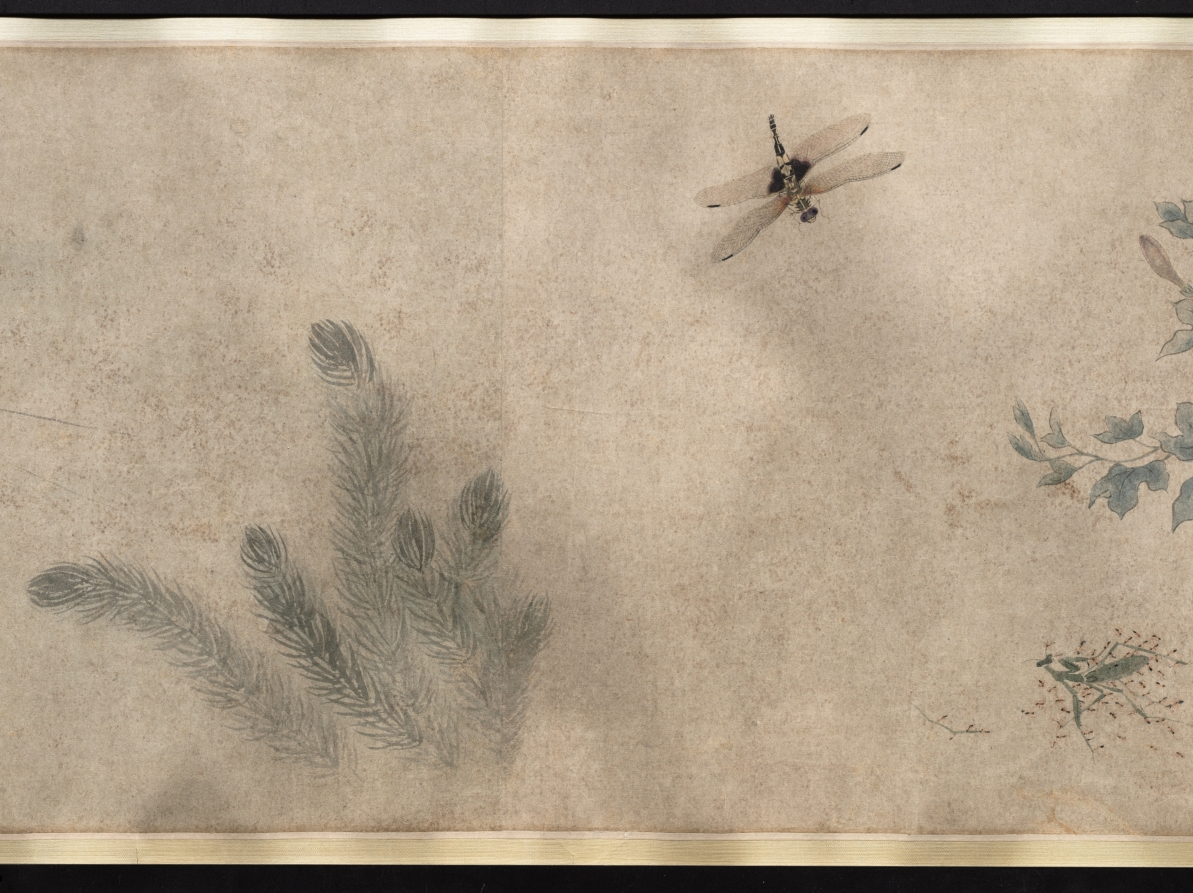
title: Insects and Flowers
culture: China, Qing dynasty (1644-1911) or Republican period (1912-49)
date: c. 1900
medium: Handscroll, ink and color on paper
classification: Painting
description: More than 26 feet long, this scroll presents insects, reptiles, and plants in delicate brushwork and pale colors, referring in style to earlier Southern Song dynasty (1127–1279) bird-and-flower paintings. Upon closer inspection, ants dismember a butterfly and reptiles wait to ambush their prey. An inscription at the end of the painting gives us an idea of its meaning: Attributed to the Qing dynasty scholar Zhang Xigeng (張錫庚, 1801–1861), the inscriber relates the work to an earlier painting by Qian Xuan (錢選, c. 1235–before 1307) and further suggests that the painting may allude to the relentlessness of natural selection. By drawing a parallel to tumultuous episodes in Chinese history, the writer might even hint at the domestic rebellions and the aggression of Western powers against China in his lifetime, particularly the Opium Wars (1839–60).